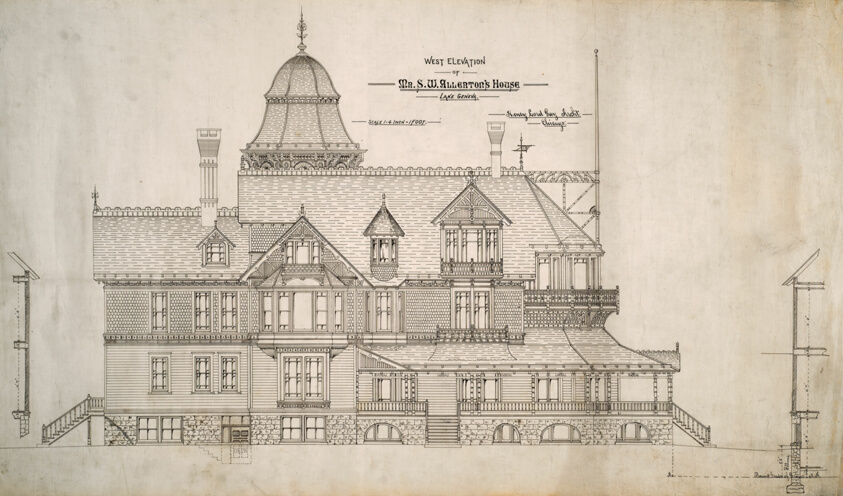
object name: Architectural Drawing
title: House for Mr. S.W. Allerton, Lake Geneva, Wisconsin: West Elevation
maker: Henry Lord Gay (American, 1844-1921)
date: c. 1884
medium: Ink on linen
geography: United States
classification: ink; architectural drawing